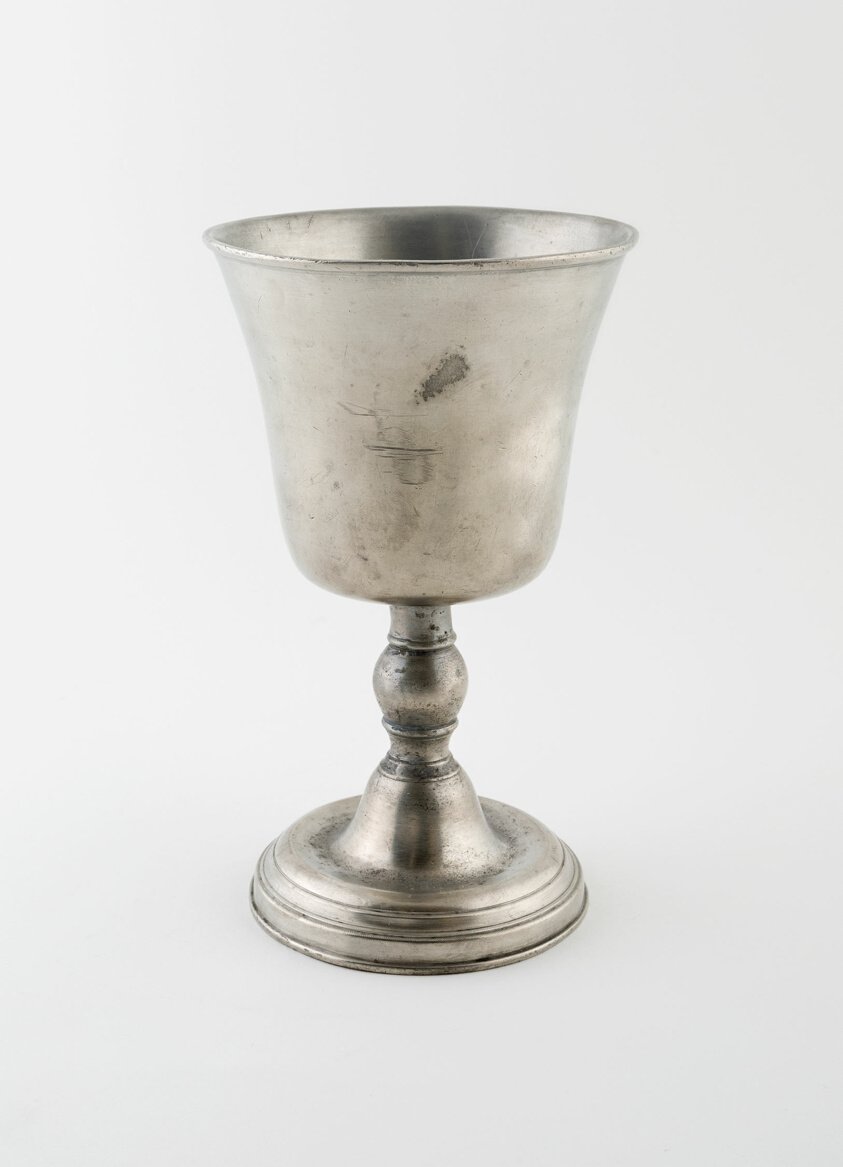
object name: Metalwork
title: Chalice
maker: Probably Scotland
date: c. 1800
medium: Pewter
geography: Scotland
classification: drinking vessel; pewter; metalwork; european decorative arts